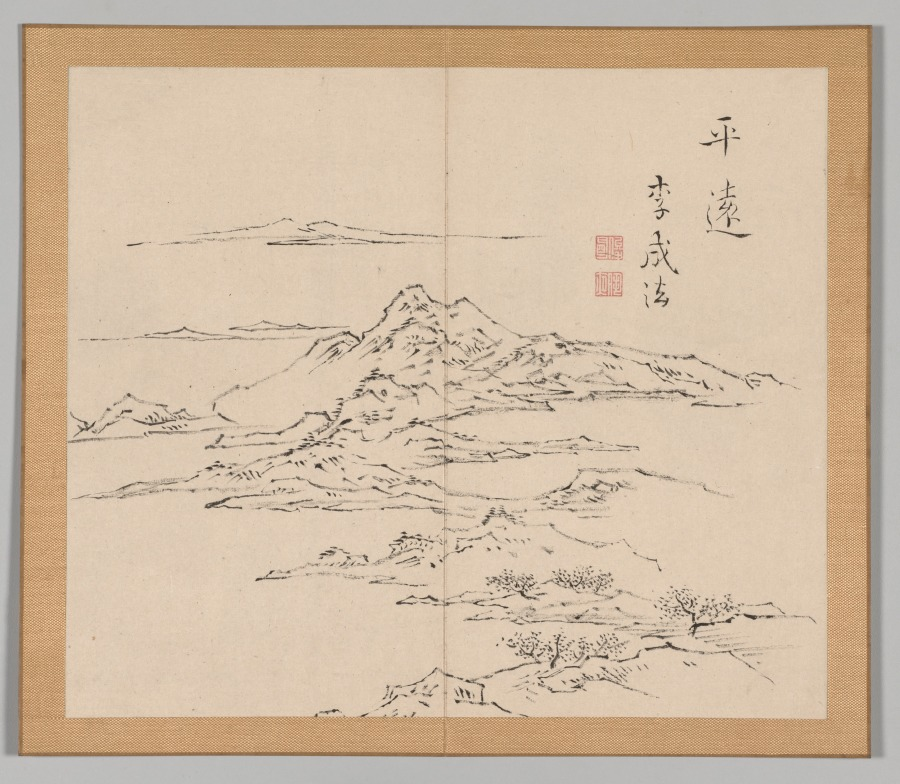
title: Reverberations of Taiga, Volume 2 (leaf 8)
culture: Japan, Edo period (1615–1868)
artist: Aoki Shukuya (Japanese, d. 1802)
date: mid- to late 1700s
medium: double-leaf from a pair of albums; ink and light color on paper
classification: Portfolio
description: Traditionally, young painters in Japan began their studies with an established master-painter. The master's compositions invariably became models that the apprentice copied to learn various ink and brush techniques. Shukuya was a pupil of the famous Kyoto artist Ikeno Taiga, whose style is reflected in these sketches of rocks, trees, and mountains.